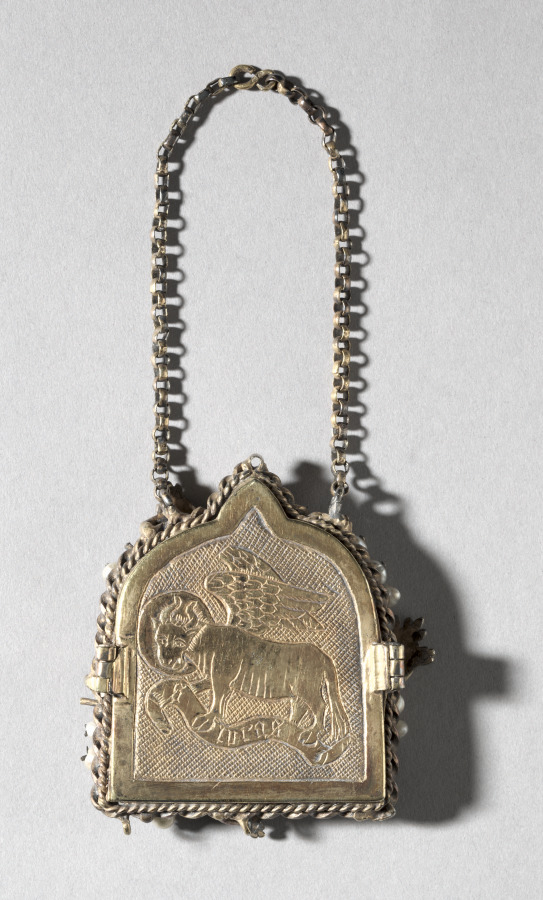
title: Pendant Icon with the Virgin "Dexiokratousa" and Frame with Winged Bull of Saint Luke on the back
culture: Byzantium (pendant); Germany, Aachen (frame), Byzantine period, 12th century (pendant); Byzantine period, 14th century (frame)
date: pendant 1100s; frame mid-1300s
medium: steatite, gilt silver, pearls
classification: Glyptic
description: This small-scale Byzantine icon depicts a half-length figure of the Virgin holding the Christ child. When the icon was mounted in its present frame by a German artist in the 14th century, it was considered to be an authentic portrait painted by Saint Luke. This claim, made in an inscription on the frame, is further emphasized by the ox, Saint Luke’s symbol, engraved on the frame’s reverse.